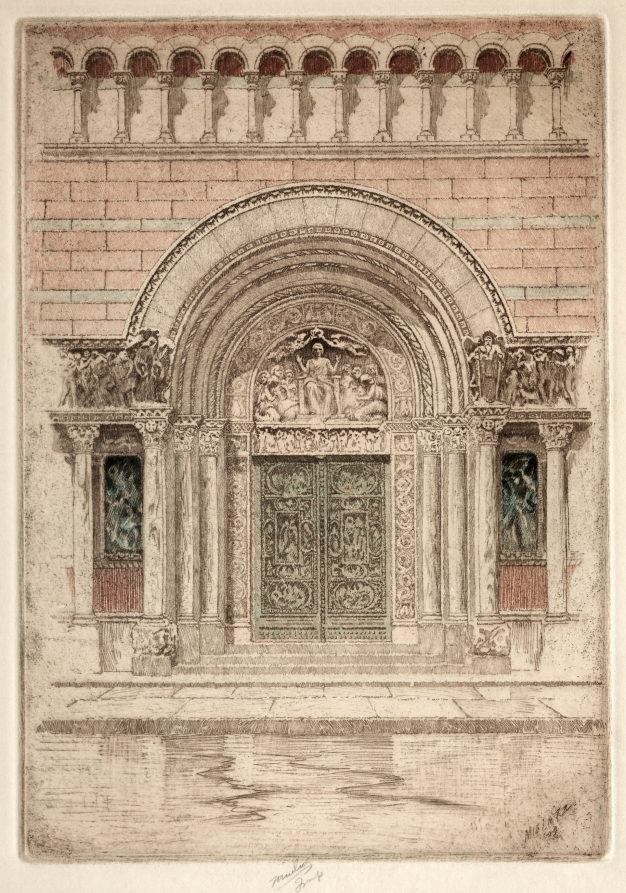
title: Door of St. Bartholomew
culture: America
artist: Karl Friedrich Wilhelm Mielatz (American, 1864–1919)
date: 1909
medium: soft-ground etching and roulette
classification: Print